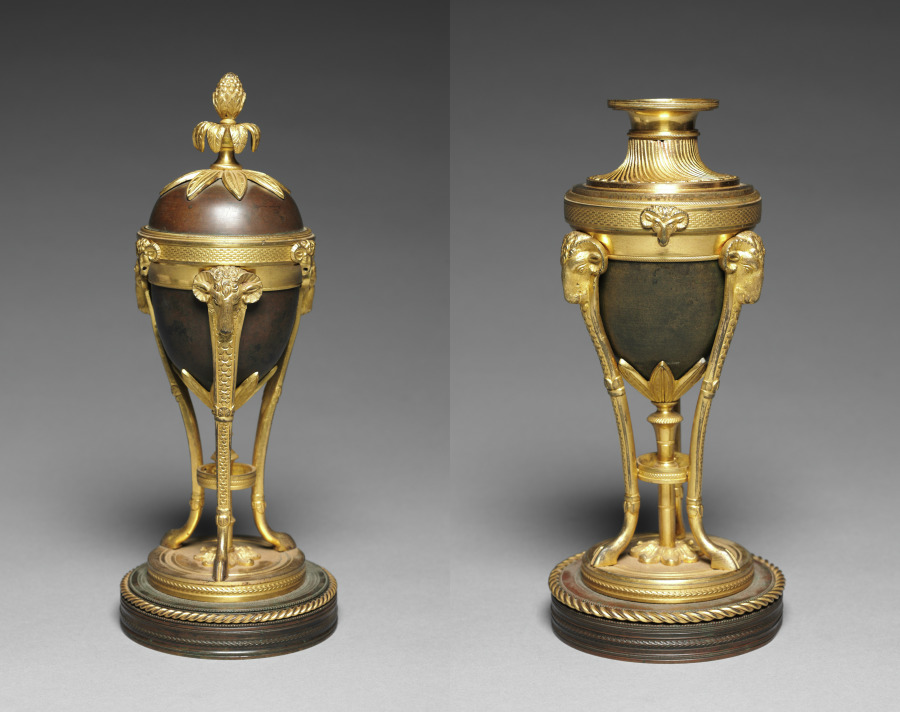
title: Pair of Urn Convertibles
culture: England, late 18th century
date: late 1700s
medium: dark bronze, mounts in ormolu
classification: Furniture and woodwork